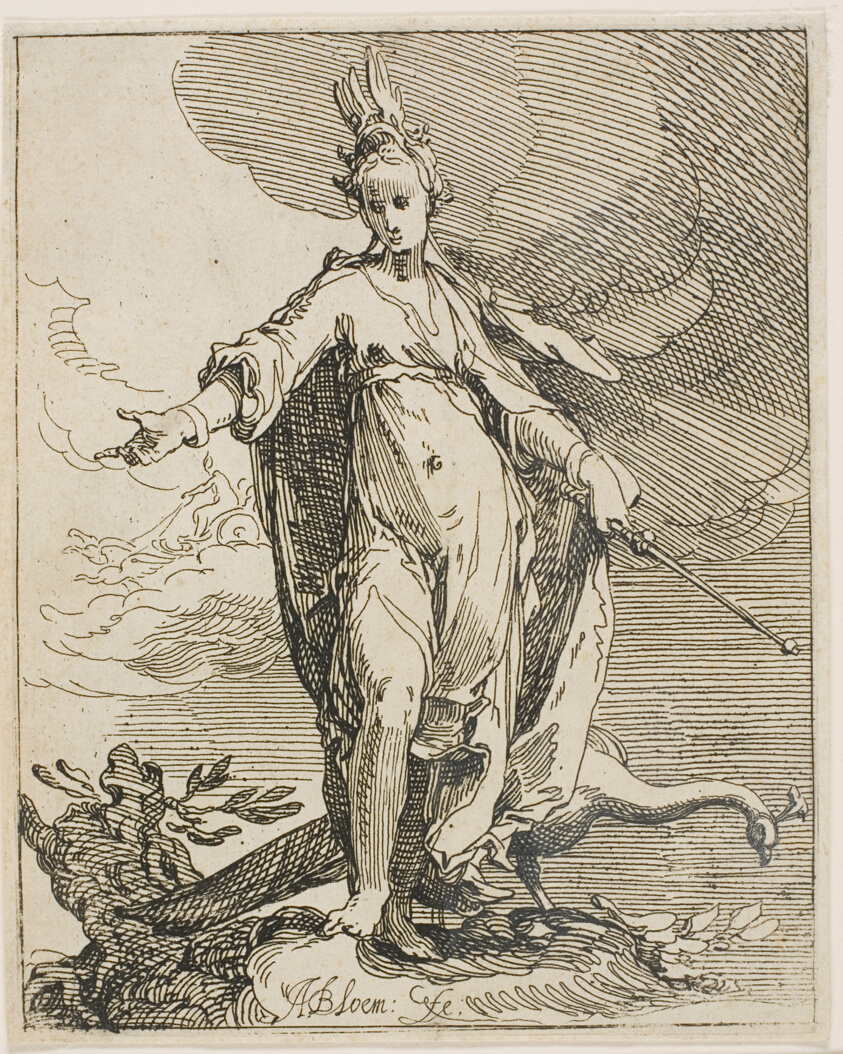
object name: Print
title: Juno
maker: Abraham Bloemaert (Dutch, 1566-1651)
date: c. 1610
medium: Etching, on ivory laid paper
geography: Holland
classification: etching; print; prints and drawing